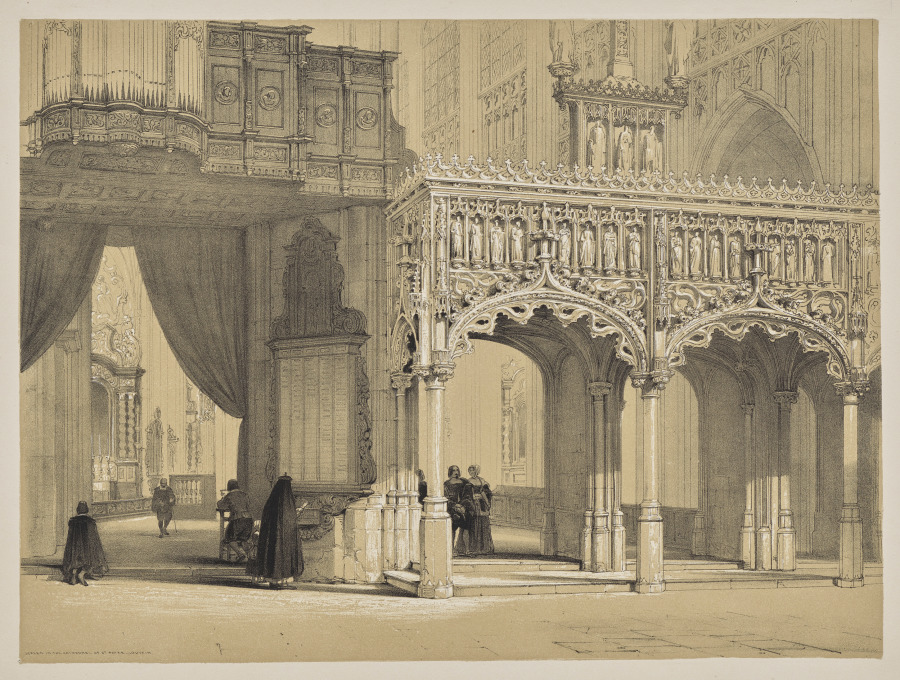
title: Sketches in Belgium and Germany, First Series, Screen in the Cathedral of St. Peter, Louvain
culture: England, 19th century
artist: Louis Haghe (British, 1806–1885)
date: 1845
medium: lithograph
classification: Print